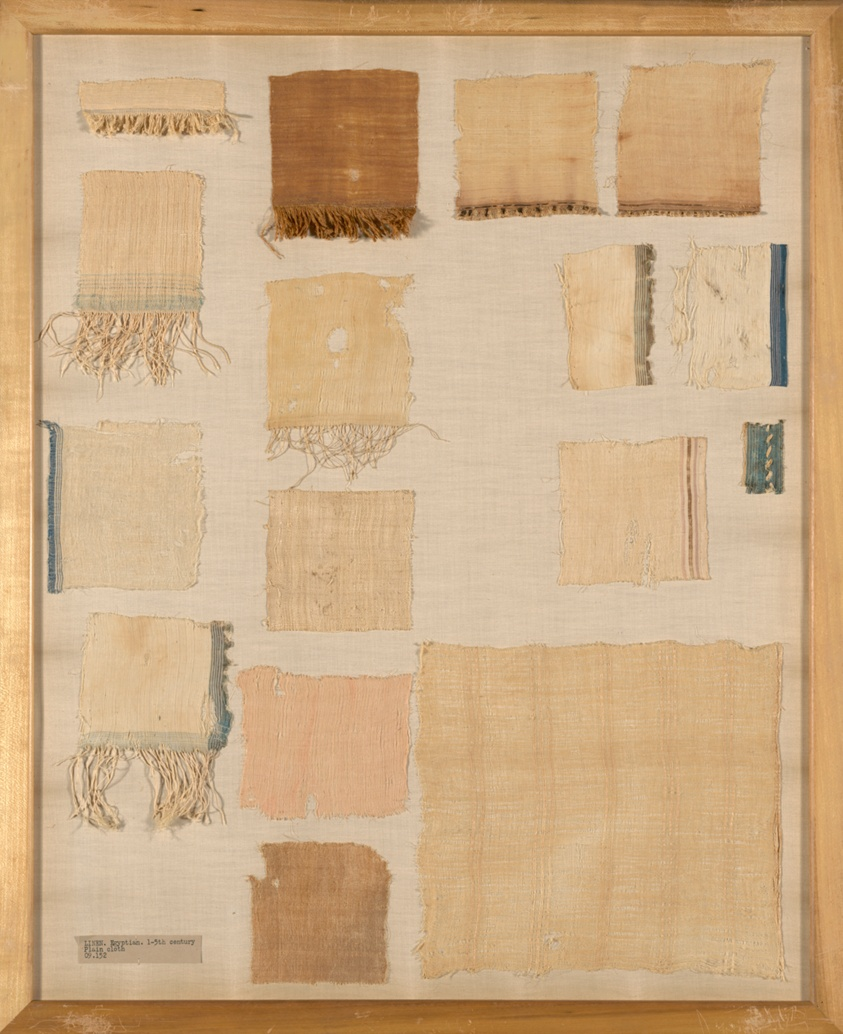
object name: Textile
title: Seventy Mummy Wrapping Fragments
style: roman period (egyptian)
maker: Egypt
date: Roman period (30 B.C.– 641 A.D.)/Arab period (641–969), 1st/8th century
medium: Linen, foremost in plain and gauze weaves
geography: Egypt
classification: textile; weaving